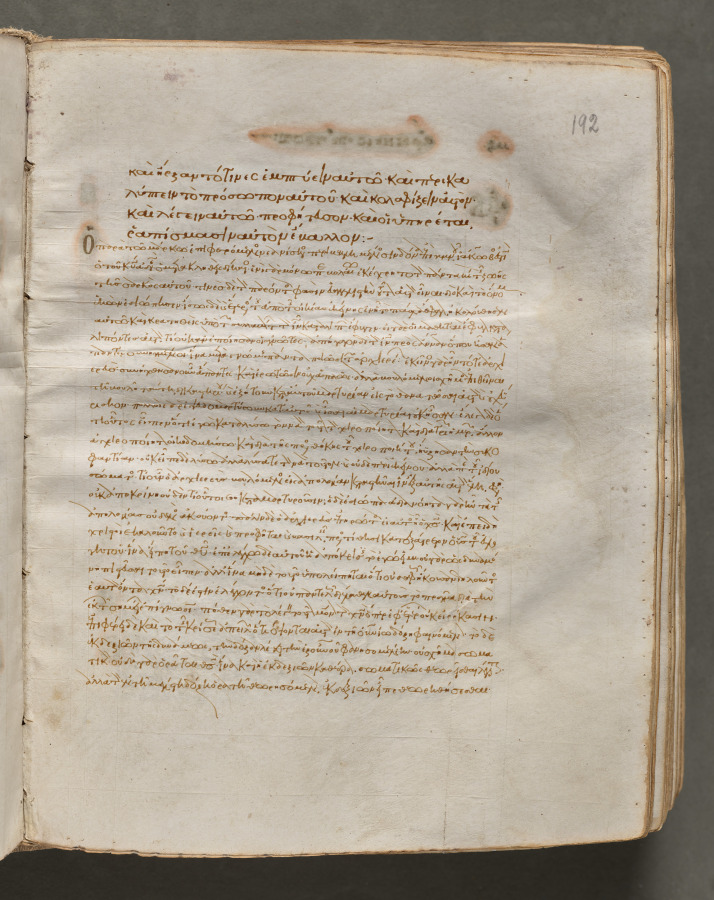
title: Text, folio 192 (recto), from a Gospel Book with Commentaries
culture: Byzantium, Constantinople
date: c. 1000–1100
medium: ink, tempera, and gold on vellum; leather binding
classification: Bound Volume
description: Each of the four gospels in this book opens on a page with brilliantly illuminated borders depicting the author of the text as well as birds-principally peacocks, symbols of the immortality of the soul-and fountains, representing the fountain of life and the salvation of the soul. This volume consists of 428 leaves with texts in Greek. Its level of sophistication suggests that it was probably written and decorated in a monastery in Constantinople.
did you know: Gospel Books were carried in procession through Byzantine churches.